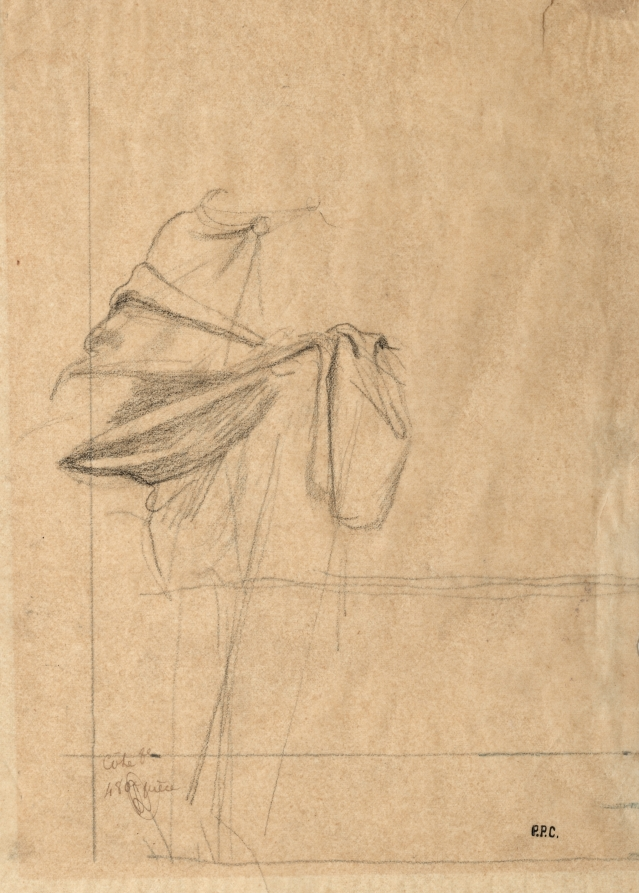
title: Drapery Study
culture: France, 19th century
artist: Pierre Puvis de Chavannes (French, 1824–1898)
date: second half 1800s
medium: black chalk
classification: Drawing